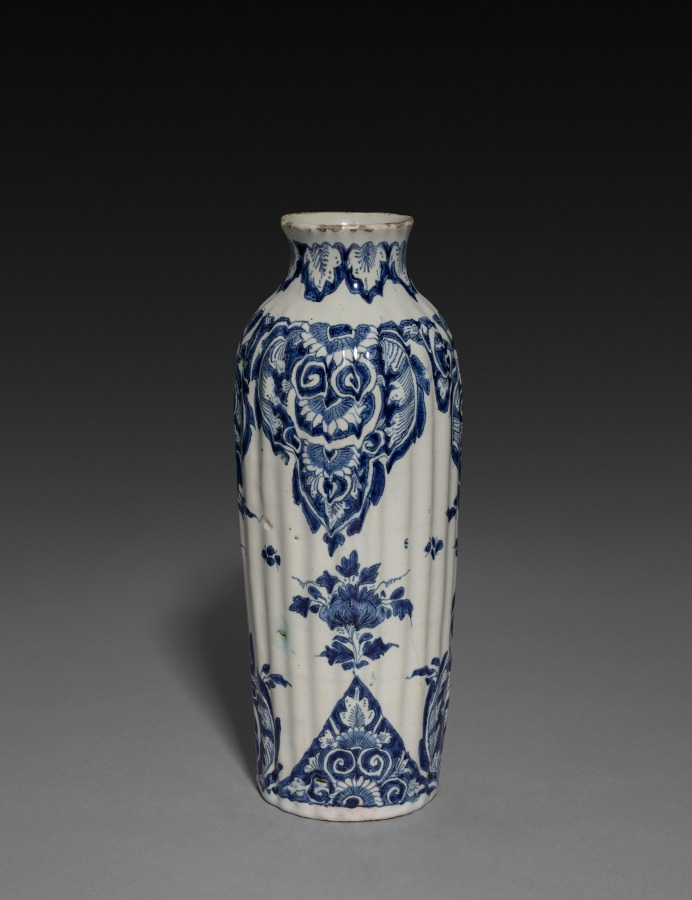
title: Bottle-Shaped Vase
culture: France, Rouen, early 18th Century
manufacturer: Rouen Factory (French)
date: c. 1700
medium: faience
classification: Ceramic